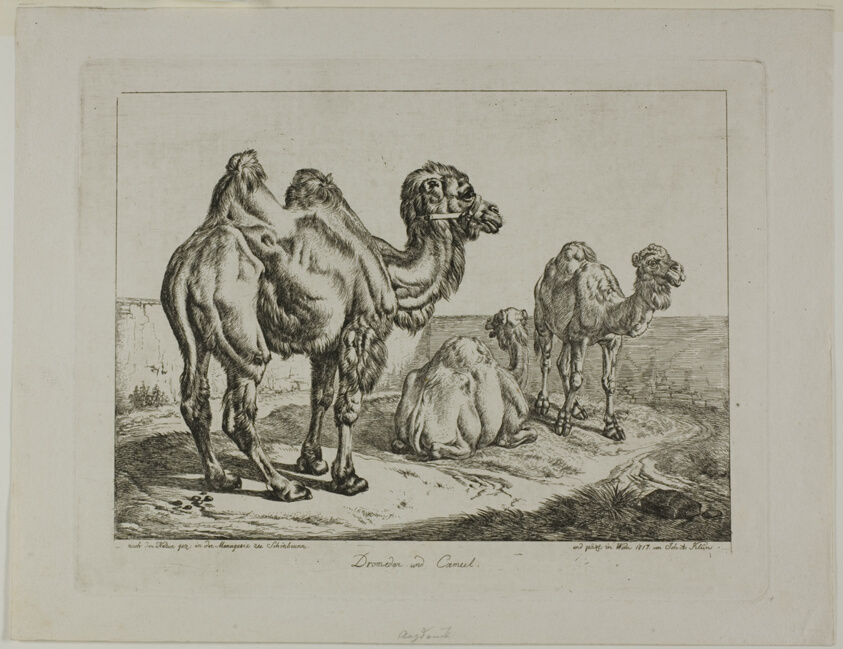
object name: Print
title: Dromedary and Camel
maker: Johann Adam Klein (German, 1792-1875)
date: 1817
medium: Etching in black on ivory wove paper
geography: Germany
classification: etching; print; prints and drawing